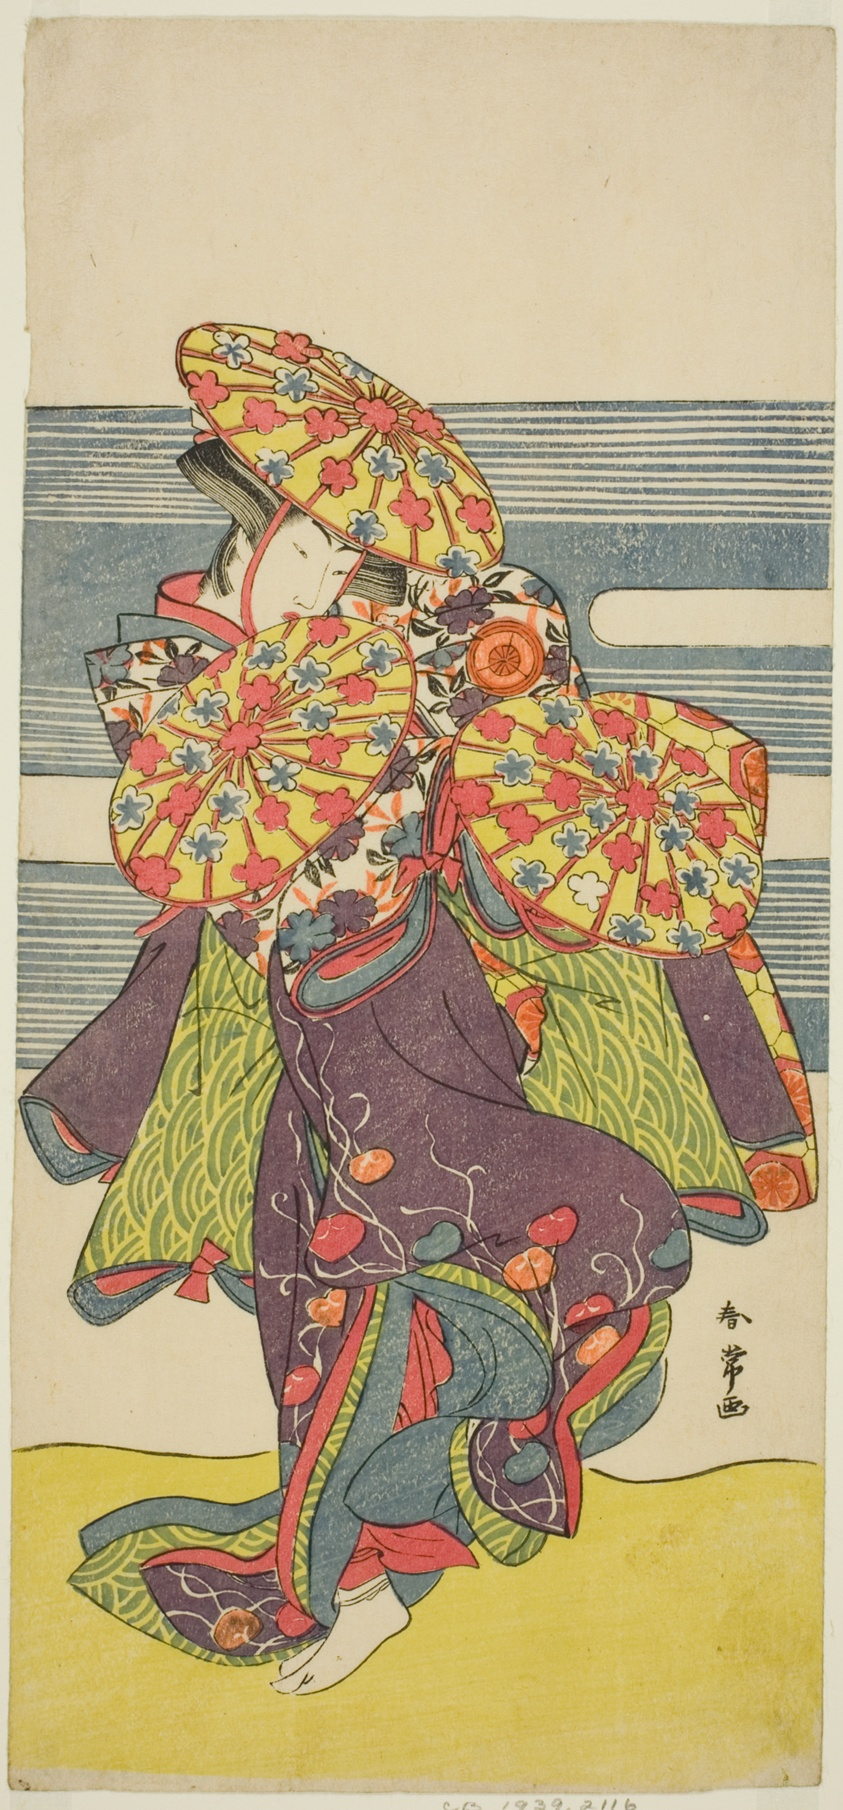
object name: Print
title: The Actor Iwai Hanshiro IV in the Hanagasa Dance in the Play Iromi-gusa Shiki no Somewake, Performed at the Nakamura Theater in the Ninth Month, 1781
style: Japanese (culture or style)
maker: Katsukawa Shunjo; Japanese, died 1787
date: c. 1781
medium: Color woodblock print; hosoban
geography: Japan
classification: woodblock print; print; asian art